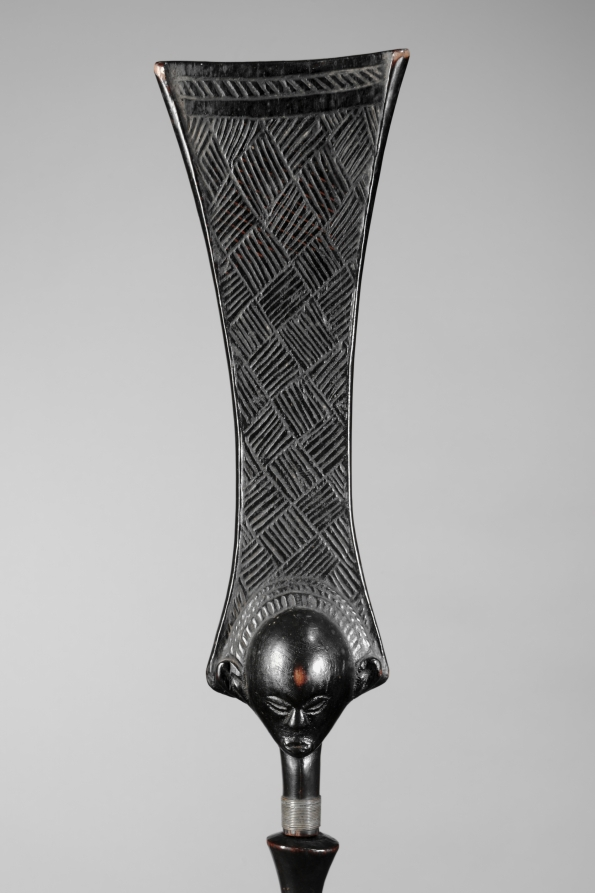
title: Staff of Office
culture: Central Africa, Democratic Republic of the Congo, Luba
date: early to mid-1800s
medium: Wood and iron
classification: Sculpture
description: Sanctified by a ritual specialist and enhanced with medicinal substances, the staff possessed supernatural qualities and was endowed with healing power. Luba staffs are among the most important regalia of Luba kings. The metal point alludes to the kingdom's stability and durability. Each staff has its own distinctive iconography to reflect regional styles. As Chief Msidi (former owner of this staff) ruled over the Yeke kingdom (and not the Luba kingdom), it begs the question of how he acquired this symbol of another realm's power.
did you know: The Yeke kingdom ruler Chief Msidi gave this as a gift of appreciation to the British missionary Frederick Stanley Arnot, whom the chief had invited to his kingdom.